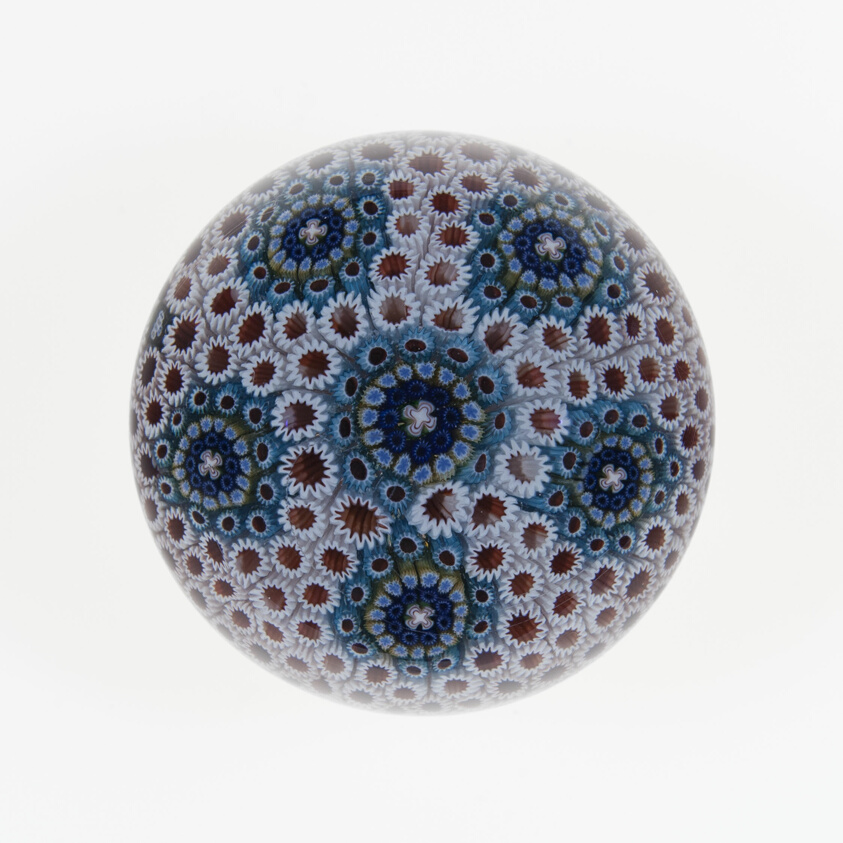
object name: Glass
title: Paperweight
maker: Saint-Louis Glassworks (Cristalleries de Saint-Louis); Lorraine, France, founded 1586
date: 1848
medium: Glass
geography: Saint-Louis-lès-Bitche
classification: paperweight; millefiori; european decorative arts; glass